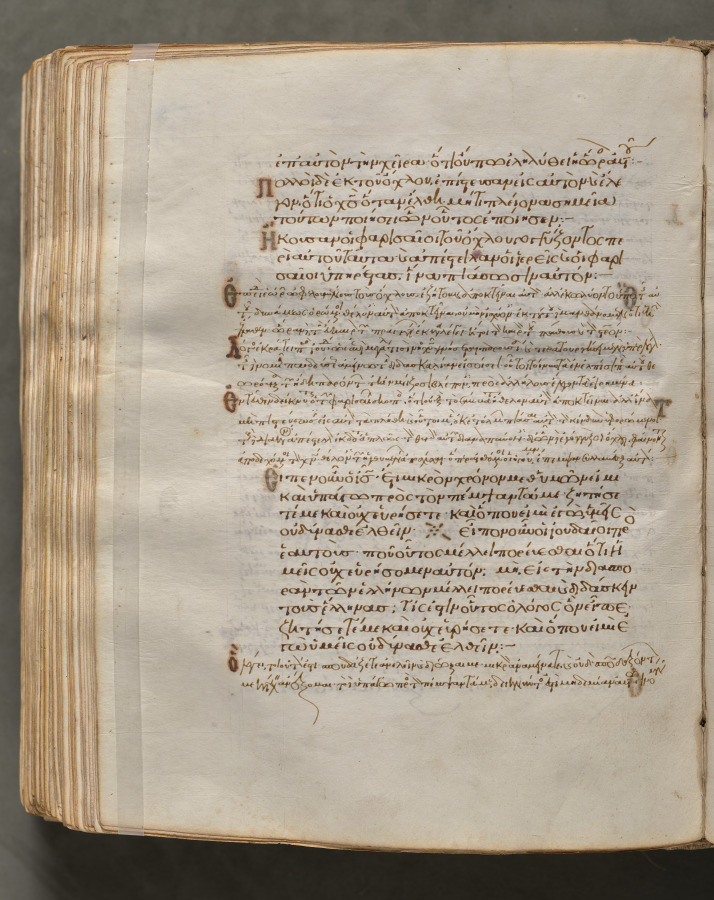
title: Text, folio 359 (verso), from a Gospel Book with Commentaries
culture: Byzantium, Constantinople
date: c. 1000–1100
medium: ink, tempera, and gold on vellum; leather binding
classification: Bound Volume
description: Each of the four gospels in this book opens on a page with brilliantly illuminated borders depicting the author of the text as well as birds—principally peacocks, symbols of the immortality of the soul—and fountains, representing the fountain of life and the salvation of the soul. This volume consists of 428 leaves with texts in Greek. Its level of sophistication suggests that it was probably written and decorated in a monastery in Constantinople.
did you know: Gospel books were carried in procession through Byzantine churches.